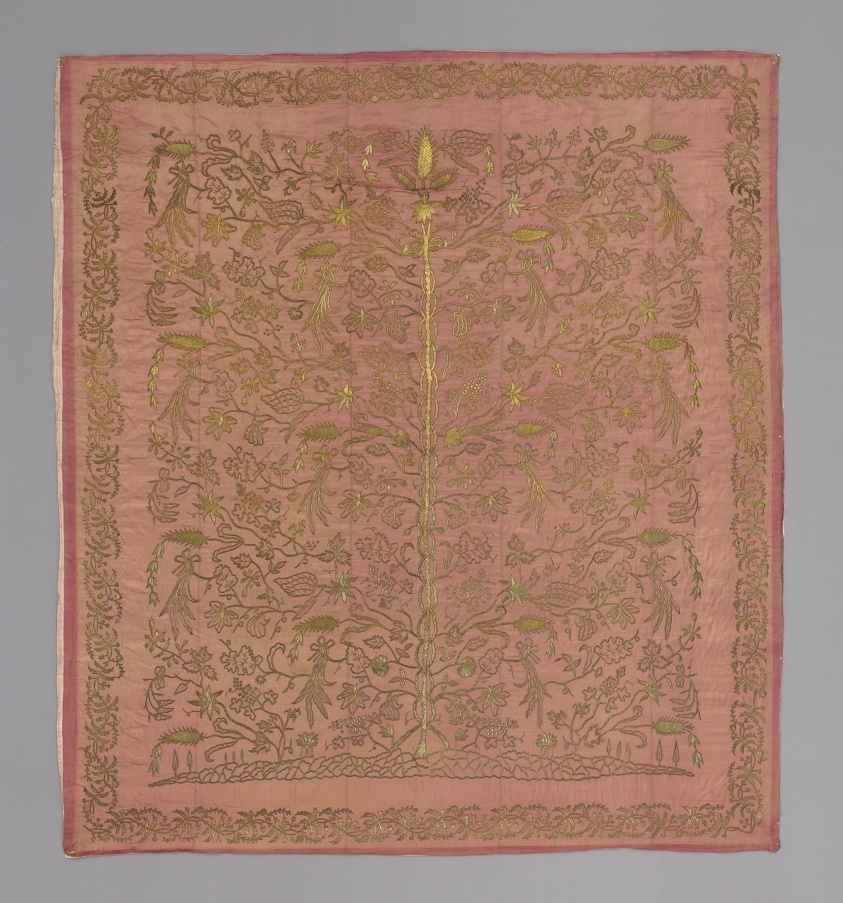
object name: Textile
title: Bridal Bedcover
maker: Turkey, Istanbul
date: c. 1877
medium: Five panels joined: silk, satin weave; embroidered with gilt-metal-strip-wrapped silk in laid work and couching over card; lined with cotton, twill weave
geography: Turkey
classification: needlework (visual works); textile